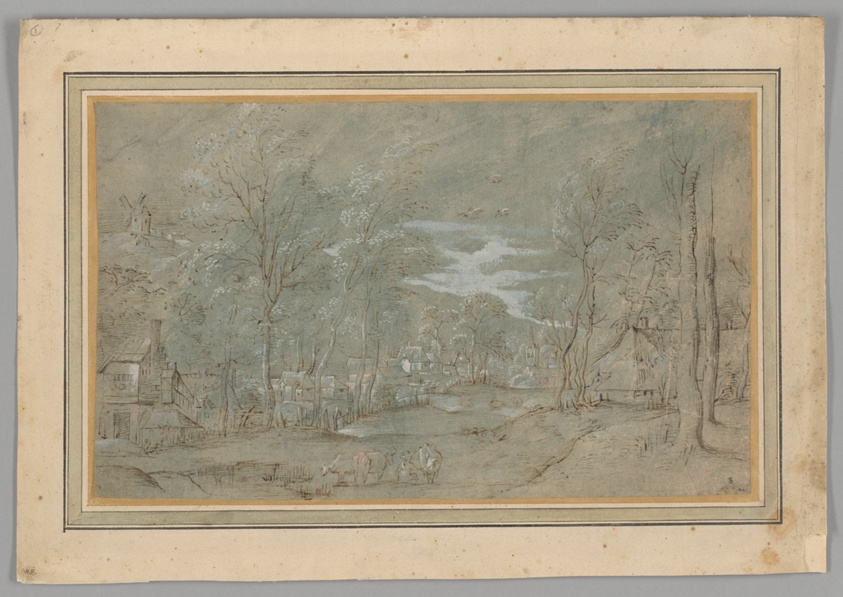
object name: Drawing and Watercolor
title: Village Among the Trees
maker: Unknown artist; Flemish, active in Antwerp, mid-16th century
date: c. 1560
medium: Pen and brown ink, heightened with opaque white watercolor and touches of pink and yellow watercolor, over black chalk, on blue tinted laid paper, laid down on laid paper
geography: Flanders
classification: pen and ink drawings; drawings (visual works); prints and drawing